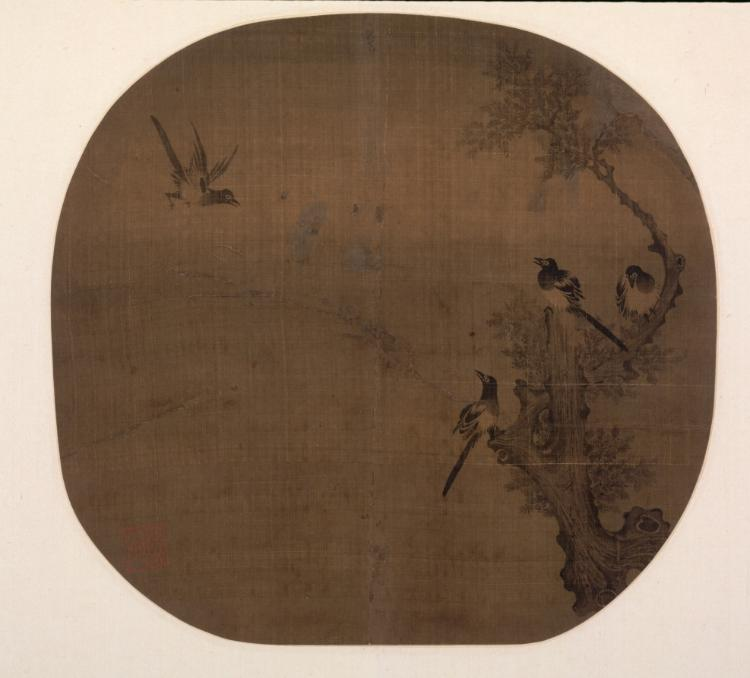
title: Returning Birds and Old Cypress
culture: China, Southern Song dynasty (1127-1279)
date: late 1100s–early 1200s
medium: Album leaf; ink on silk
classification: Painting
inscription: 1 unidentified seal reads: Yun-chou shan-jen [Mountain dweller of the cloudy islet].